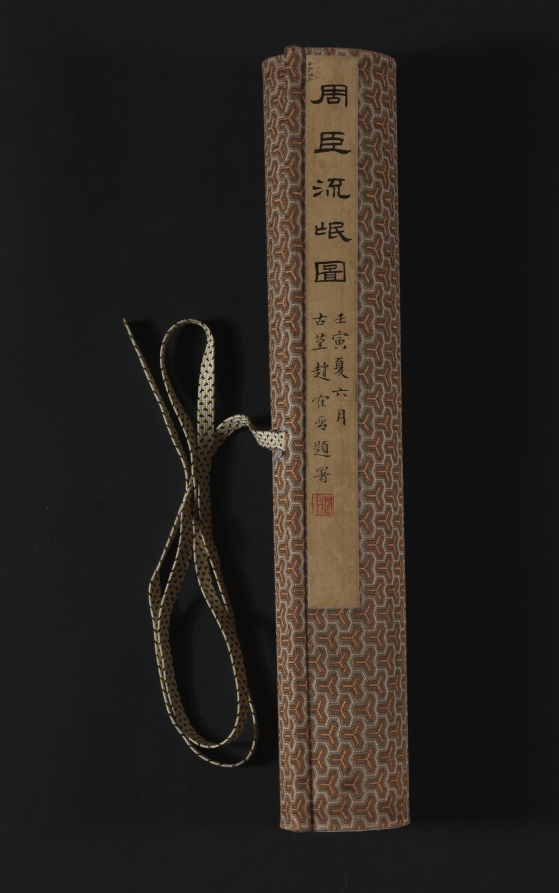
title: Beggars and Street Characters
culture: China, Ming dynasty (1368–1644)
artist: Zhou Chen (Chinese, c. 1450–c. 1536)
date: 1516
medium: Handscroll; ink and light color on paper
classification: Painting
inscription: 題: 周臣流氓圖. 古堇趙鶴琴 [印] 老鶴臨池; 鵝池軒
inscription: 正德丙子秋七月，閒窗無事 ，偶記素見市道丐者種種態度。乘筆硯之便，率爾圖寫。雖無足觀，亦可以助警勵世俗云。 東邨周臣記 [印]東邨; 舜卿; 鵝場散人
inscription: 吳中東邨周君，善丹青，尤長於人物。此圖其所見盛市丐者之狀種種，各盡其態，觀者絕倒。嗟乎，今之晝夜乞哀以求富貴者，安得起周君而貌之耶。臥雲徵君出示，余漫題其後。 甲子歲十月吳門黃姬水 [印] 士雅山人; 另一印不詳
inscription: 是冊凡數種。其飢寒流離疲癃殘疾之狀，種種之異。觀此而不惻然心傷者，非仁人也。計正德丙子逆瑾之流毒已數年。而[江]彬 [錢] 寧輩肆虐方熾。意分符剖竹諸君，亦鮮有能撫字其民者。然則舜卿此作，殆與鄭君 流民圖同意。其有補於治道者不淺，要不可以墨戲忽之也。 長洲張風翼題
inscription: 東村此筆，蓋圖寫飢寒乞丐之態，以警世俗耳。而質山 [黃姬水]欲其寫昏夜乞哀，而靈墟[張鳳翼]則擬之於安上門圖。二君之見，其各有所指哉。昔唐六如每見周筆，輒稱曰：周先生！蓋深服其神妙之不可及。若此冊者，信非他人可能而有符於六如之心伏矣。豈易得耶。若黃、張之指，則又論於畫之外，不在於形似筆墨之旨也。 萬歷丁丑十二月三日 茂苑文嘉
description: Zhou Chen from Suzhou provides rare depictions of impoverished people that once filled the city’s markets and streets. Despite Suzhou’s prosperity, its rapid growth polarized society, including the wealthy and those who had deserted their farmlands, who were without homes, unemployed, or sick. Amid these are figures who inspire fear rather than empathy. The painting may thus be informed by local practices at the end of the lunar year, in which street beggars, in exchange for food or money, would dress up like ghosts and demons to drive out evil forces.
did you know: Although Zhou Chen's original composition was an album of 24 figures, today it is mounted as two handscrolls, one in the Cleveland collection and one in the Honolulu Museum of Art.